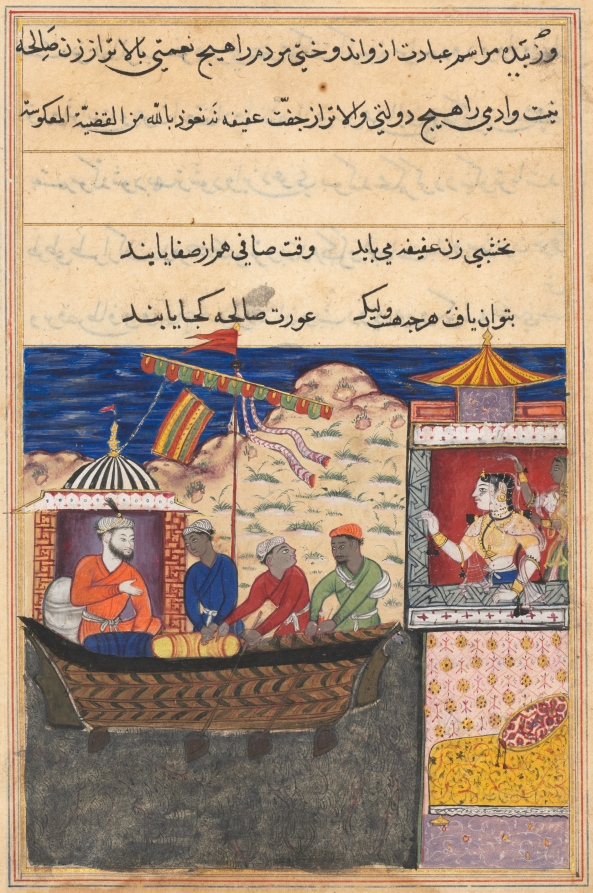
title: The merchant Mansur departs on a sea voyage, leaving his wife behind, from a Tuti-nama (Tales of a Parrot): Seventeenth Night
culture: Mughal India, court of Akbar (reigned 1556–1605)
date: c. 1560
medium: gum tempera, ink, and gold on paper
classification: Painting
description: Mansur, a wealthy and successful merchant, prepares to leave home on a long and dangerous journey. He sits dressed in orange at the head of his ship alongside a group of assistants. His wife, renowned for her virtue and beauty, sees him off from her second-story chamber.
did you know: Thirteen fish are hidden in the dark waters beneath Mansur’s ship.